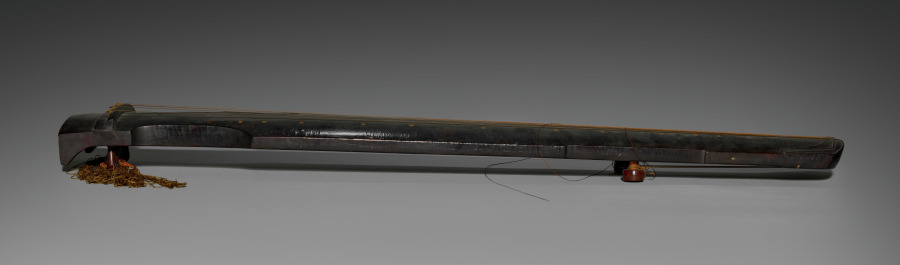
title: Guqin made by Zhang Ruixiu of Suzhou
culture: China, Ming dynasty (1368–1644)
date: 1584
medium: Seven-string Asian long zither, chordophone, made from wood, lacquer, mother of pearl, and silk strings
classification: Musical Instrument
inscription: 為海虞天池先生重斲/ 萬曆甲申古吳張睿脩得古桐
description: China’s most prestigious instrument, the guqin can be traced to the Chu culture almost 2500 years ago. By the late Ming dynasty, Jiangnan was a center of high-end guqin production. Coated in black lacquer, this elegantly crafted instrument is inscribed on the inside, stating it was made by Zhang Ruixiu of Suzhou for Mr. Tianchi of Haiyu, also known as Yan Cheng (1547–1625). Yan was a key figure in guqin music history and founder of the Yushan school in Suzhou. Zhang Ruixiu was a guqin maker, known for achieving a supreme tone quality. Ten instruments attributed to him are known, of which this guqin has the earliest date.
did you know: The 13 studs in mother-of-pearl inlay indicate finger positions for sounding harmonics.